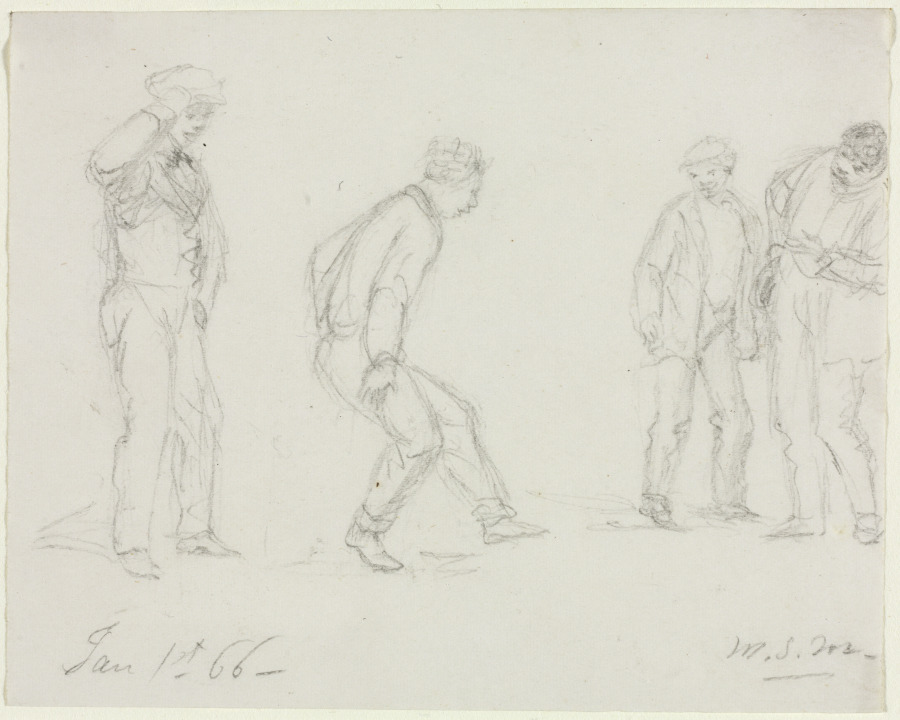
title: The Jig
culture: America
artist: William Sidney Mount (American, 1807–1868)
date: c. 1866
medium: graphite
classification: Drawing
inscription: Signed with initials in pencil